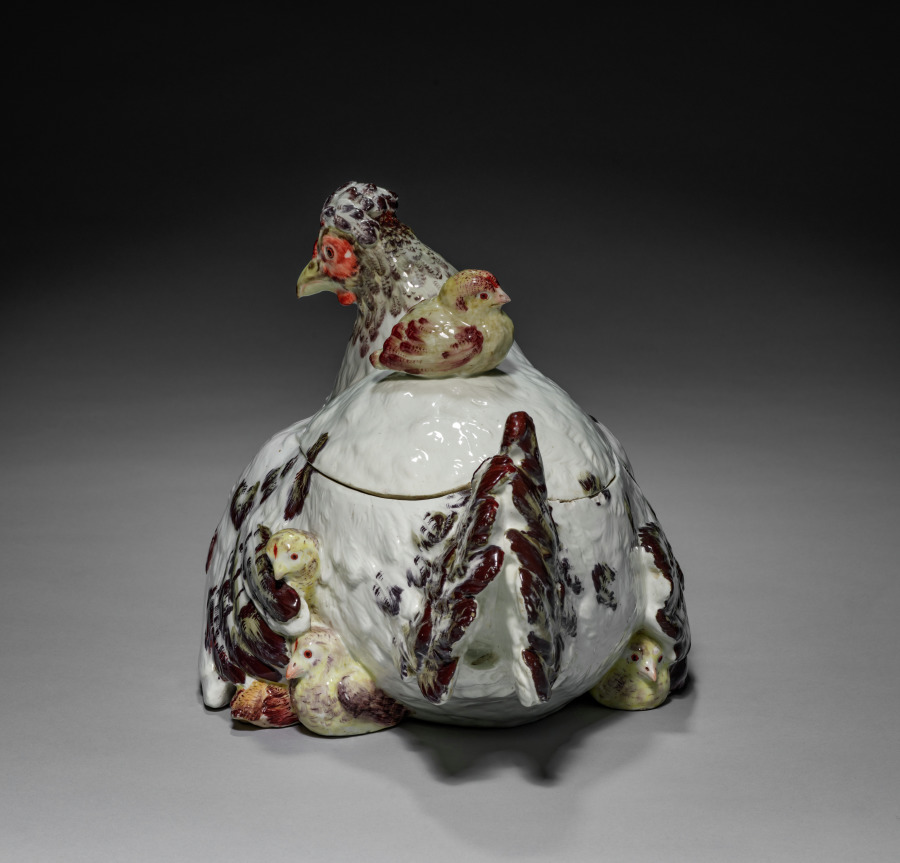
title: Hen and Chicks Covered Tureen on Stand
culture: England, London, Chelsea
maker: Chelsea Porcelain Factory (Britain, London, 1745–84)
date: c. 1755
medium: soft-paste porcelain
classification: Ceramic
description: The ceramic factory at Chelsea, located along the river Thames in western London, was Britain’s most renowned factory of decorative porcelain in the mid-1700s. Large tureens in the form of chickens or rabbits appealed to wealthy aristocrats, who took great care in developing specimen animal and poultry breeds on their country estates. The design for this particular tureen was taken from a popular seventeenth-century print by Francis Barlow depicting a farmyard.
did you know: Though the form of a soup tureen suggests a functional role at the dining table, such large, expensive porcelains were probably only used for decoration because hot liquids might have easily caused them to crack.